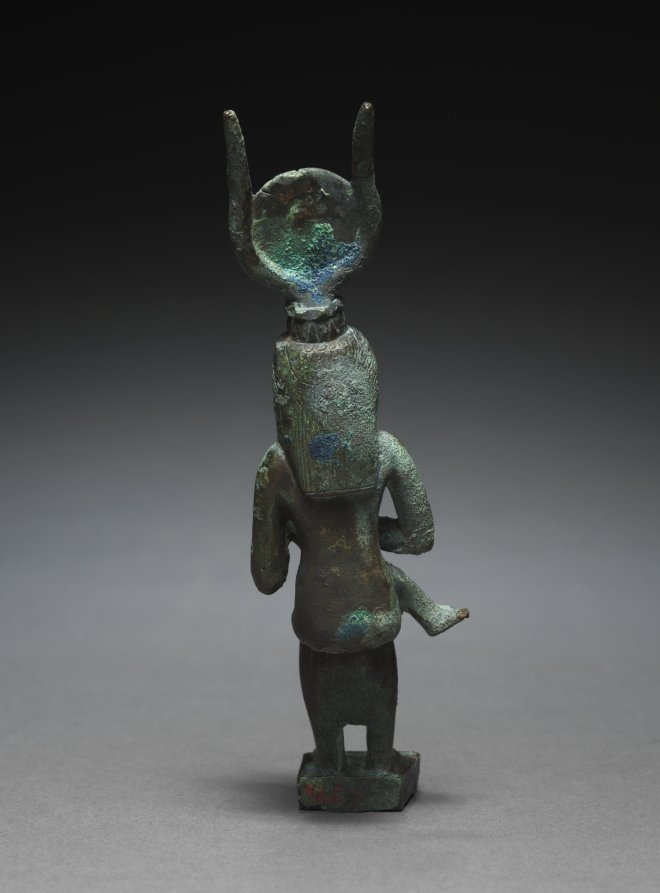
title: Statuette of Isis and Horus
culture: Egypt, Greco-Roman period (332 BCE–395 CE), Ptolemaic dynasty (305–30 BCE)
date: 305–30 BCE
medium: bronze, solid cast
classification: Sculpture